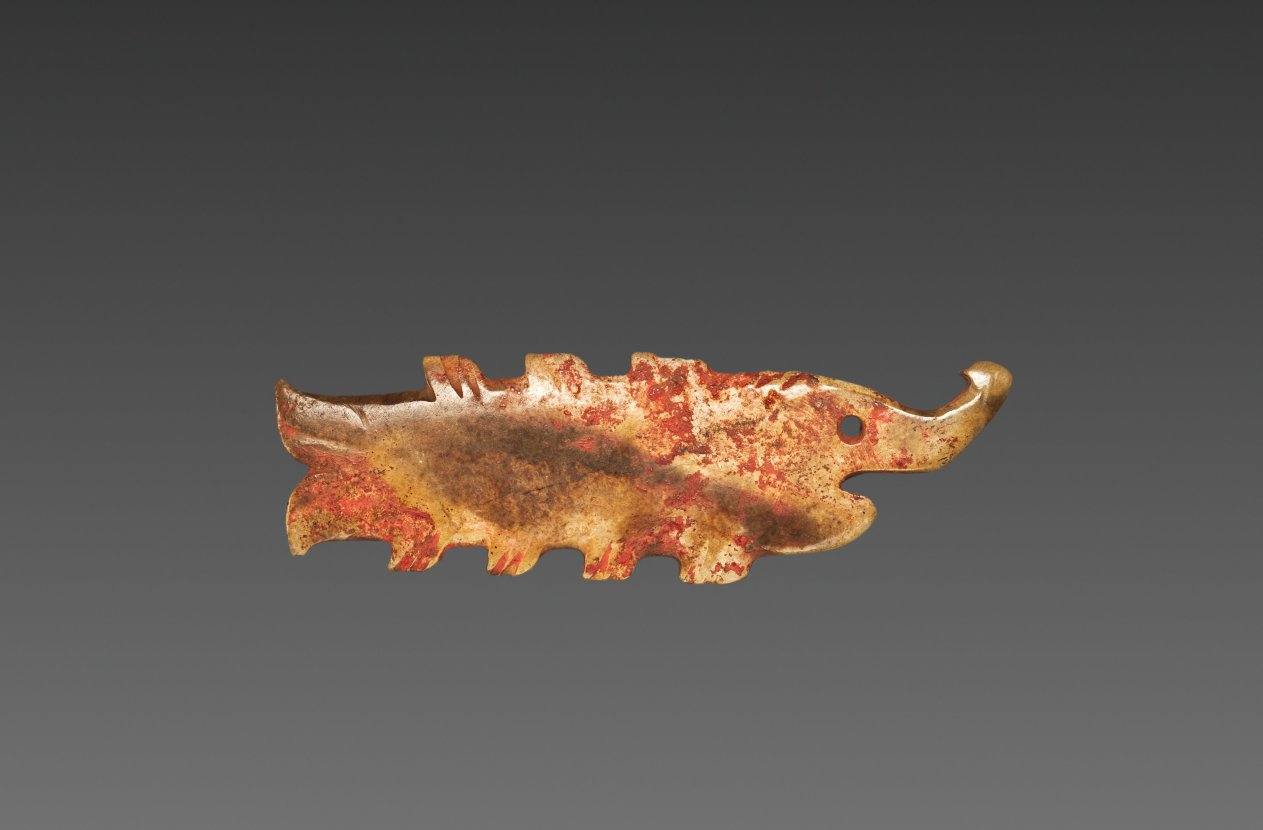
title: Fish with Curved Snout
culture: China, Shang dynasty (c. 1600–c. 1046 BCE) to Western Zhou dynasty (c. 1046–771 BCE)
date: 1200–1000 BCE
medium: jade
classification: Jade